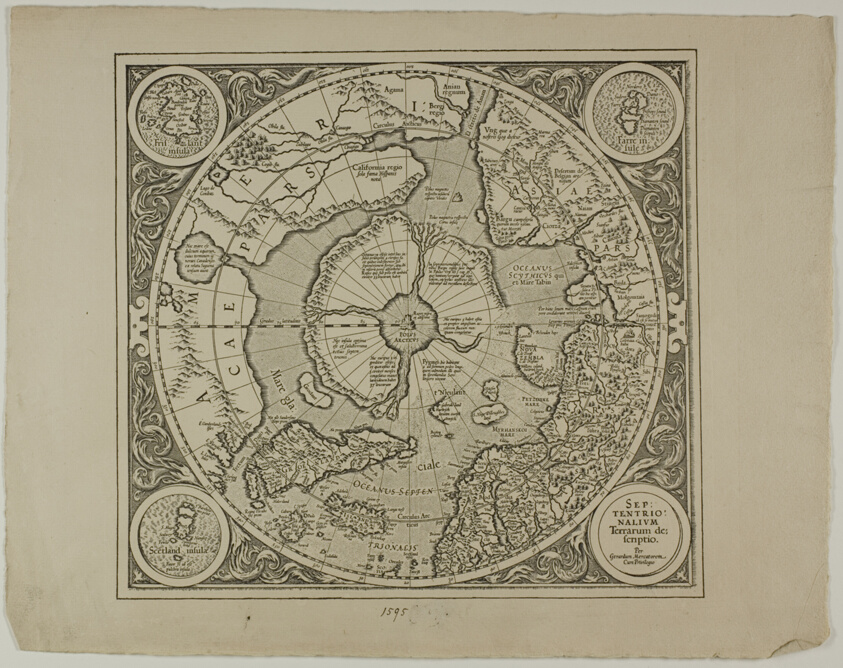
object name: Print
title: Map of the Mercator Projection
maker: Unknown Artist; English, 19th century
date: 1595, reprinted 1889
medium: Engraving in black on cream laid paper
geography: England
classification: reproduction; print; prints and drawing